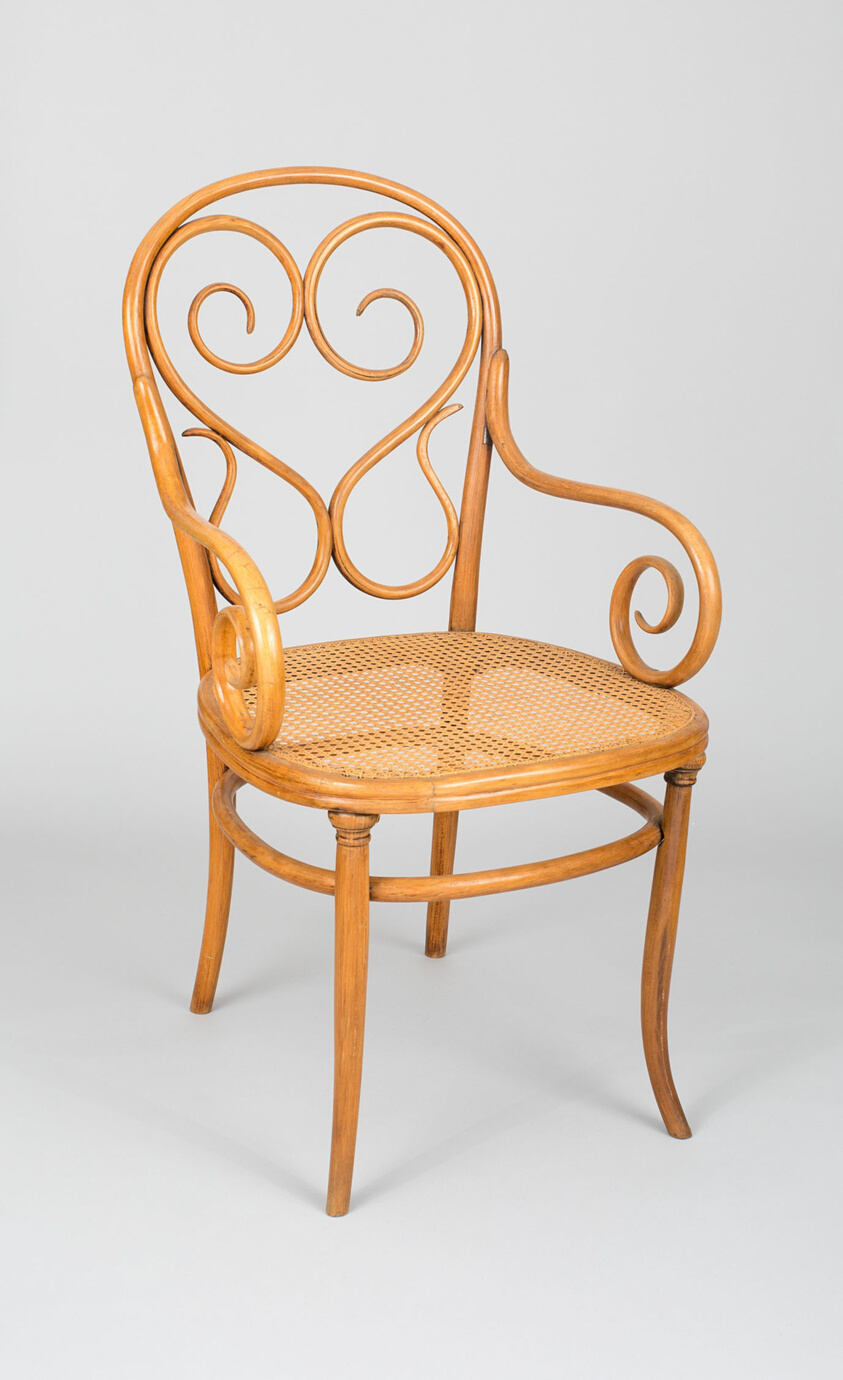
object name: Furniture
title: Armchair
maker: Michael Thonet; Austrian, 1796-1871; Thonet Brothers; Austria, founded 1849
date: Designed 1848/50; Made c. 1860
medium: Bentwood, caning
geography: Austria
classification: seating; furniture; european decorative arts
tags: furniture